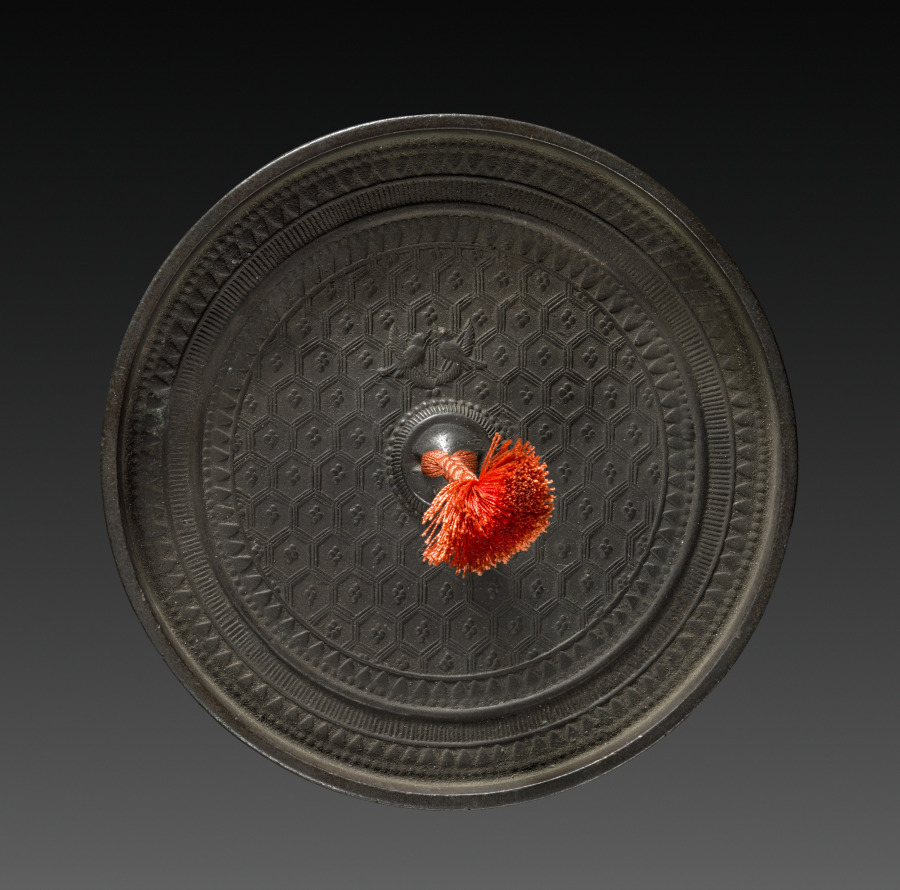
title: Mirror with Pair of Birds on Tortoiseshell Pattern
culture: Japan, Muromachi period (1392–1573)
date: 1392–1573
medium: bronze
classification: Metalwork